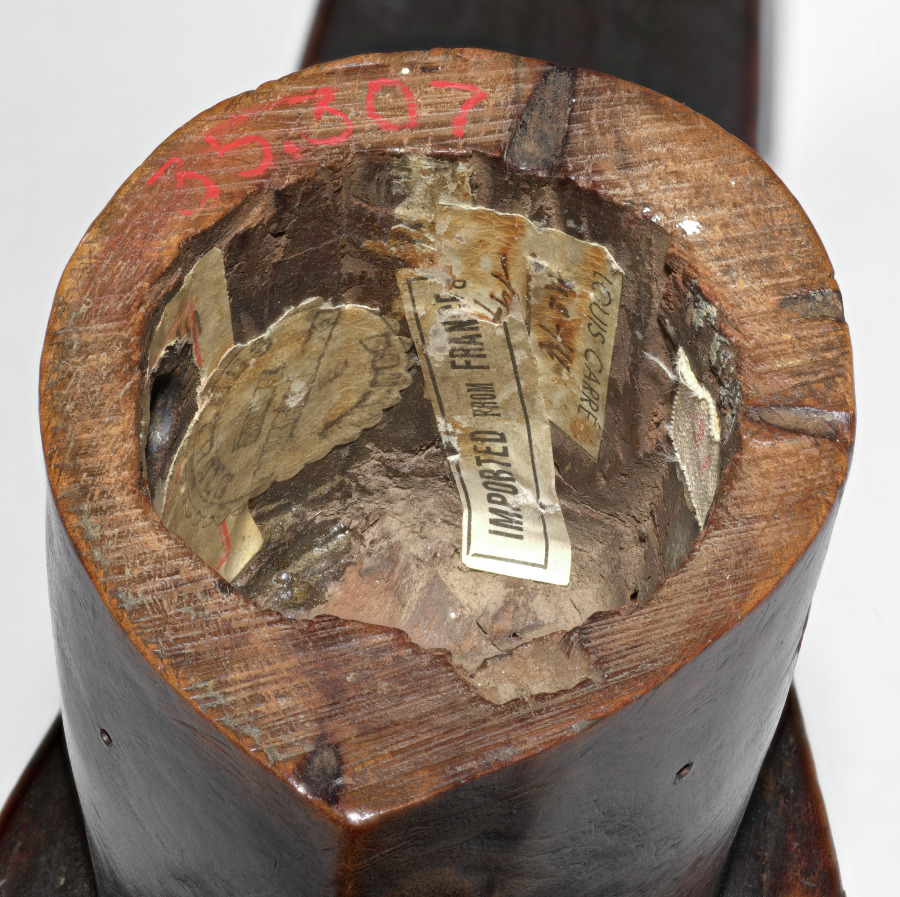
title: Head of a Hobbyhorse (korèdugaso)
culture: Africa, West Africa, Mali, Bamana blacksmith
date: late 1800s–early 1900s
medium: Wood and iron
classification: Sculpture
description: Pertaining to the male initiation society called Korè, this sculpture from the Koulikoro region represents the head of an aardvark and is part of a wooden hobbyhorse that is mounted by a ritual buffoon. The Korè initiates are divided into different classes, each having a designated mask. The ritual buffoons appear in pantomimes on different public occasions and poke fun at village authorities and other high-ranking individuals.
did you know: This is one of the best-known examples of a korèdugaso. It was featured on the catalogue cover for a 1935 exhibition at the Museum of Modern Art, one of the first on African arts in the US. It traveled to the CMA that same year.